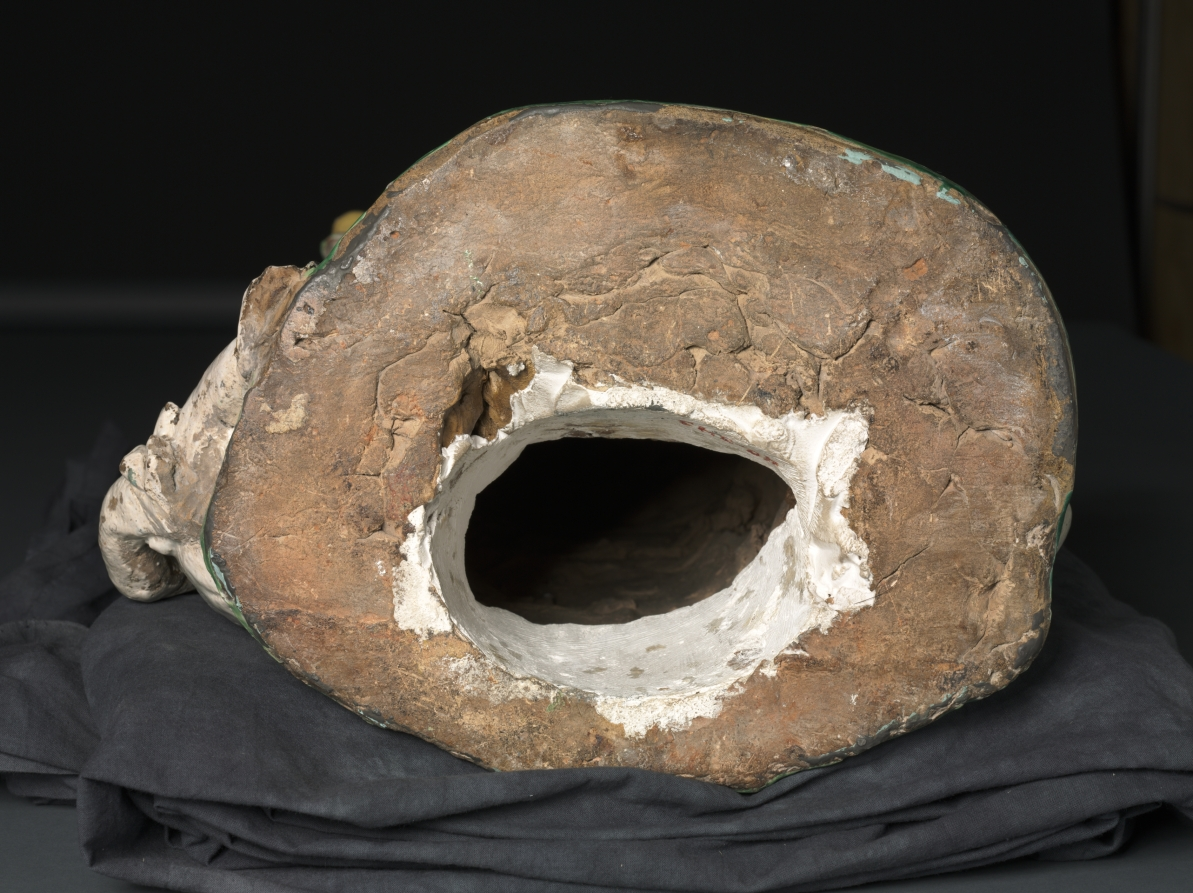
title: Dovizia (Plenty)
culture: Italy, Florence, 16th century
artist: Giovanni della Robbia (Italian, 1469–1529/30)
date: c. 1520–29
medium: glazed terracotta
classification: Sculpture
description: Many elite Florentine Renaissance homes had sculptures of idealized young women carrying nature’s bounty, such as this work. The motif stems from a statue by Donatello (about 1386–1466) that towered over Florence’s main public market. At home, however, the sculpture became a talisman for the family’s well-being. The city-state’s low birth rate was a serious political matter, and such a sculpture was believed to stimulate fertility while also promoting motherhood and bolstering financial success.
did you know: Inspired by an over life-sized, public sculpture by Donatello, Giovanni della Robbia reduced the figure for a domestic setting.